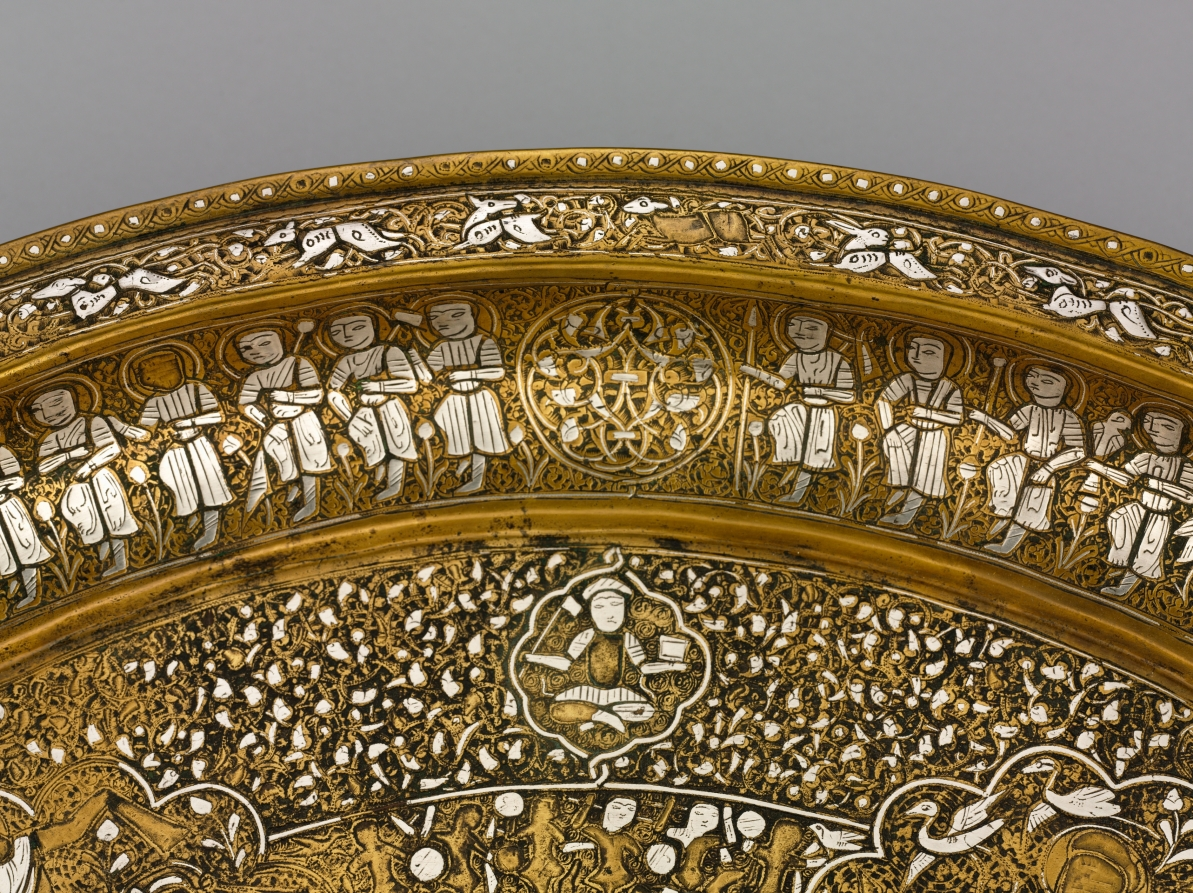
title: Tray Portraying Courtly Pleasures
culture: Syria, Ayyubid period (1171–1260)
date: 1240s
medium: sheet brass inlaid with silver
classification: Metalwork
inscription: The presence of ligatures in the narrow circular bands with interconnected human and animal figures suggests this may be a degenerate form of animated script. It is indecipherable.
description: This tray features images of courtly life interspersed with astronomical symbols. The scenes contained within large multilobed medallions display an enthroned prince with lions at his feet, a banquet, a hunt, dancers, and musicians. Contained within the concentric circles there are also references to solar and lunar motifs, including figures holding sunbursts and lunar crescents. This tray is made of a single sheet of brass and the silver inlay, which is best preserved on the tray’s inner curve, suggests its original brilliance.